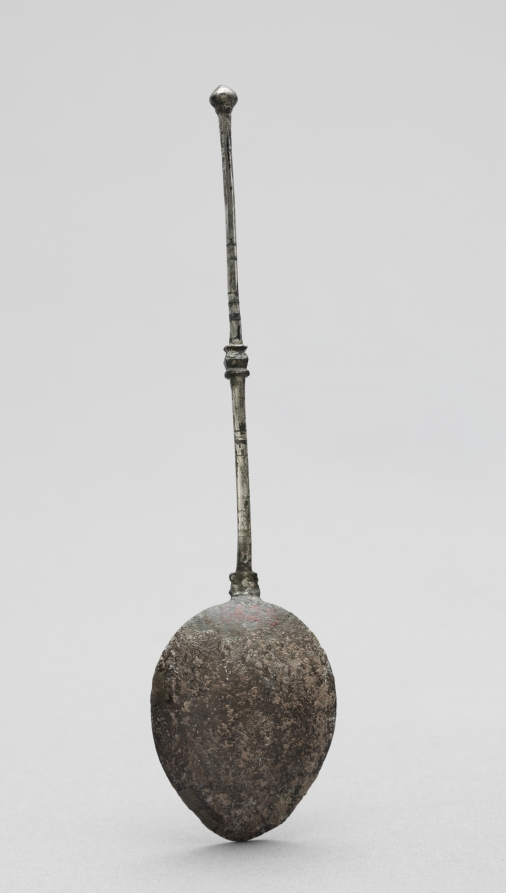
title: Spoon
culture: Byzantium, Syria(?), Byzantine period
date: 300s CE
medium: silver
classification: Metalwork